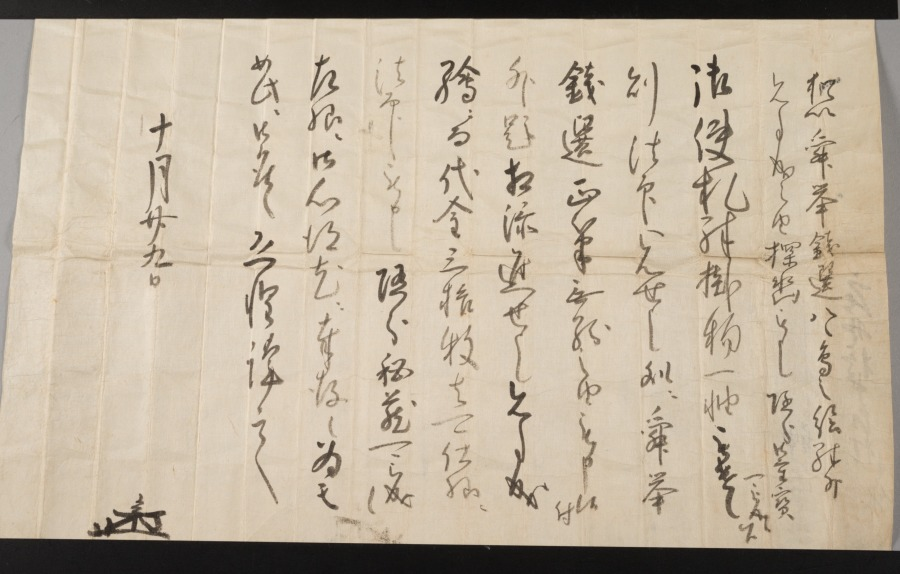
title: Crow on a Pomegranate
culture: Japan, Muromachi period (1392–1573)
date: 1500s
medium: hanging scroll; ink on paper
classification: Painting